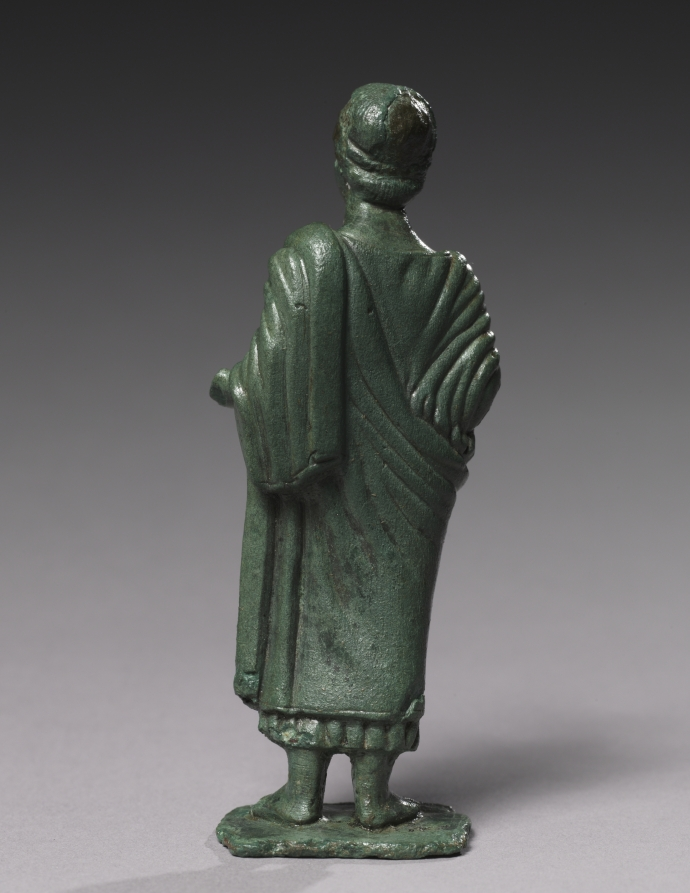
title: Female Statuette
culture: Italy, Etruscan, Archaic period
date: 600–480 BCE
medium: bronze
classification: Sculpture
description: Standing barefoot on a flat base, this woman wears a tunic with a decorated edge, a thick mantle draped over her left shoulder, and a headband. She extends both hands, though the left is damaged and the right missing. Her identity might have been made clear by the attributes she once held—a bird or pomegranate for Turan (the Etruscan analogue to Aphrodite), for example, or an offering dish or vessel for a worshipper.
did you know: The flat, integrated base of this statuette includes an attachment element below.